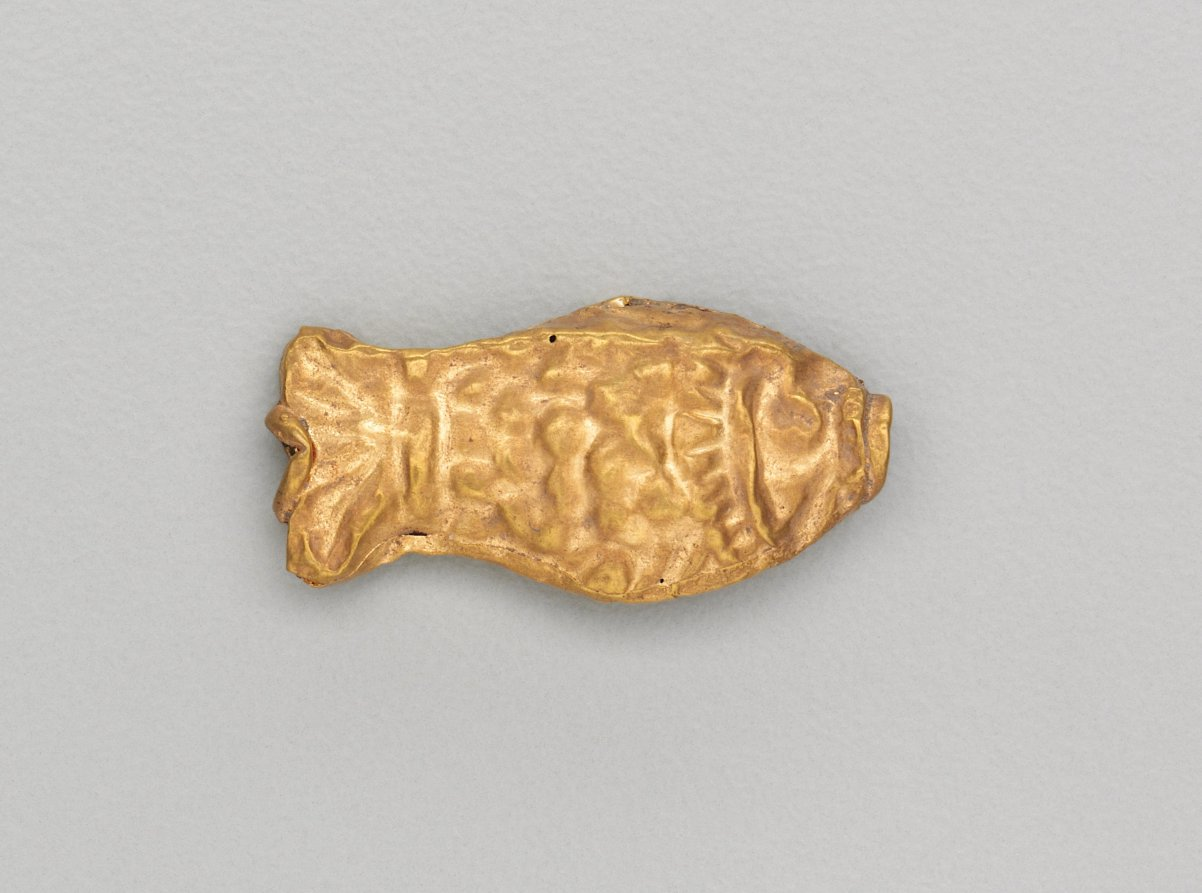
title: Necklace Bead in the Form of a Fish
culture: India, Shunga period (185–78 BCE)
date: 185–72 BCE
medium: gold repoussé with granulation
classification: Jewelry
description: Jewelry in ancient India often consisted of elements associated with water, such as fish and other aquatic plants and animals. Since water is essential for life, imagery that connotes water is life-affirming, or auspicious, and therefore appropriate adornment.